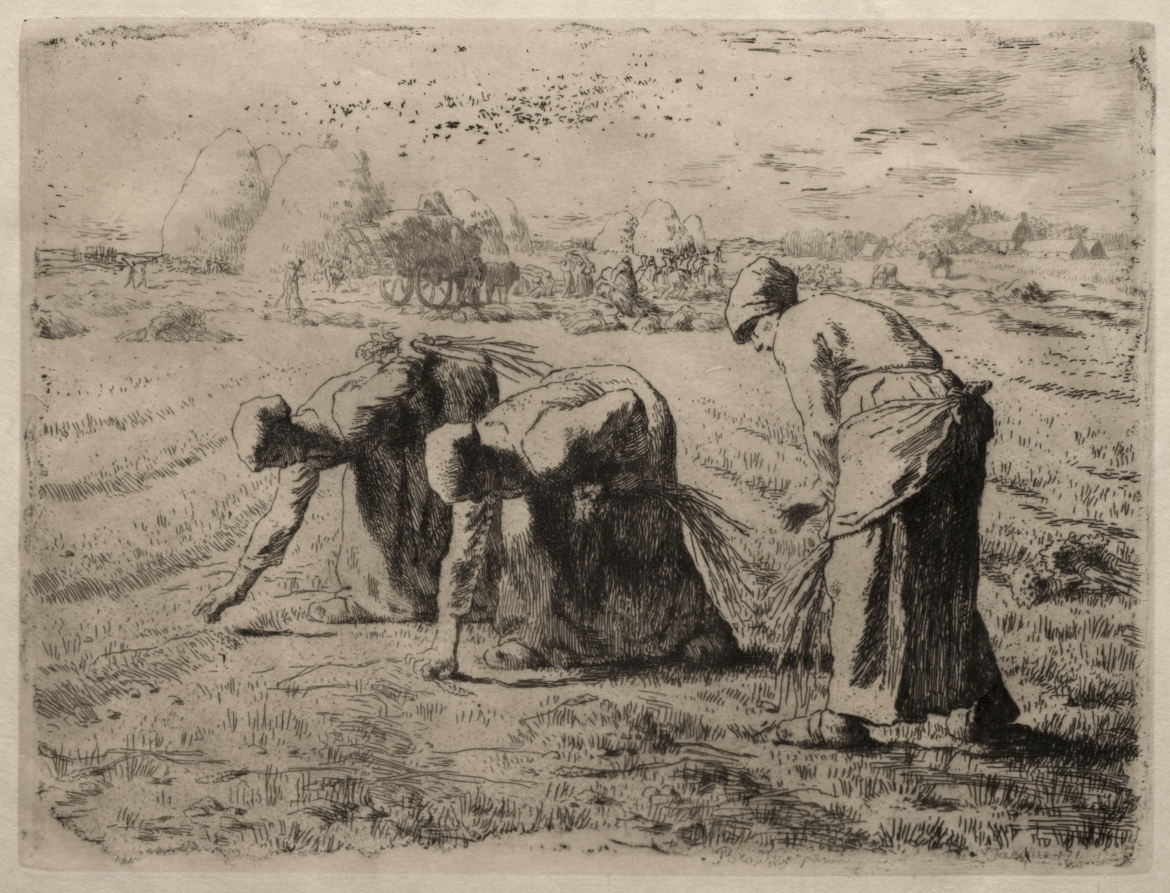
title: The Gleaners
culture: France, 19th century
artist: Jean-François Millet (French, 1814–1875)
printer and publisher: Auguste Delâtre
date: c. 1855–56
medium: etching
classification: Print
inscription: Inscribed, lower right, in plate: Paris, Imp.e par [Aug Delâtre] Rue St Jacque 171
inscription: Stamped, lower left, in purple: FREDERICK KEPPEL / MEMORIAL [not in Lugt]